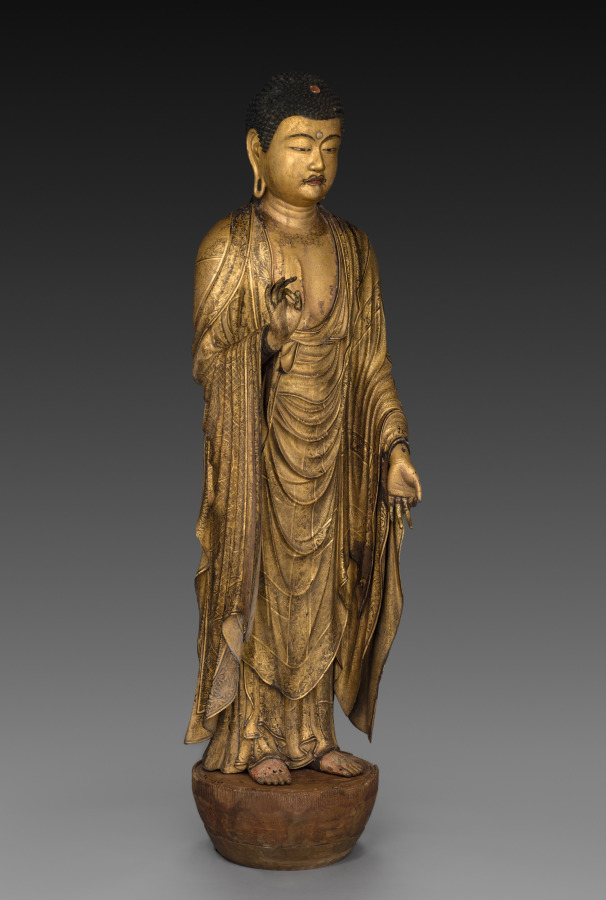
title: Buddha of Infinite Life and Light (Amida Nyorai)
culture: Japan, Kamakura period (1185–1333)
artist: Kōshun (Japanese, active mid-1200s)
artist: assisted by Koshin (Japanese, active mid-1200s)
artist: assisted by Joshun (Japanese, active mid-1200s)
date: 1269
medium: Cypress with lacquer, color, gold, cut gold, rock-crystal inlaid eyes, and quartz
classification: Sculpture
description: This ornate Buddha Amida stands in a posture of welcome, greeting the dying who will accompany him back to his Pure Land. Documents inserted into the sculpture’s hollow core around the time of its creation include a copy of the sacred text Amida Sutra, a register of donors who desired to be joined together in generating karmic merit (kechien) through the creation and dedication of the sculpture, and a record asserting that the image was completed over the course of 33 days in 1269 at Shitennōji Temple in Osaka.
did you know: The lead sculptor was Kōshun, who had been granted the lofty title “Bridge of the Law.”